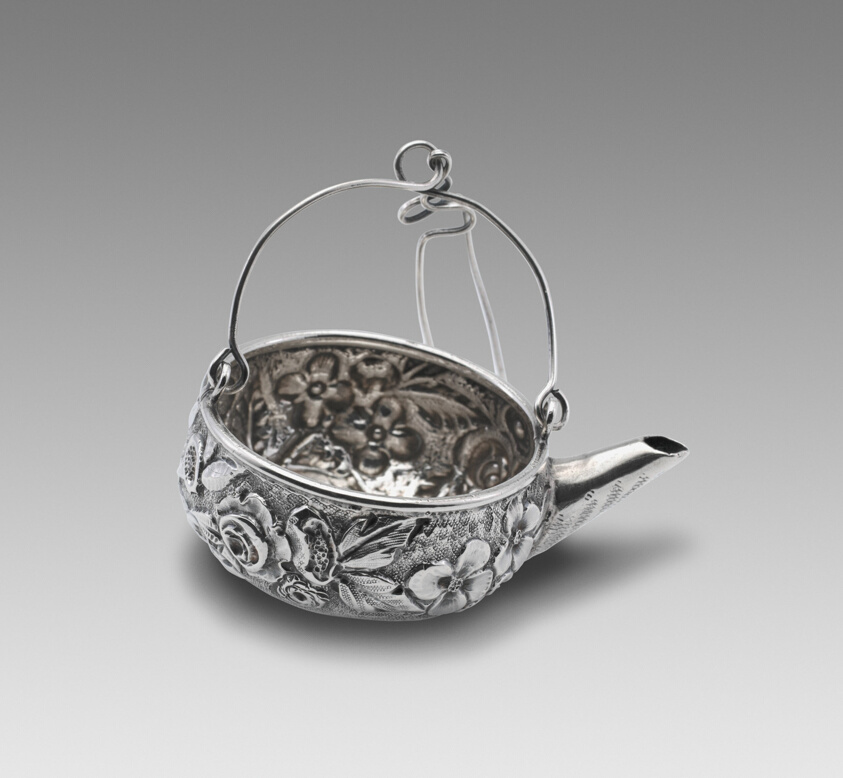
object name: Metalwork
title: Tea Strainer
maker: W.H. Saxton Jr. (American, active 1891–1896); New London, Connecticut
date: 1891–96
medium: Silver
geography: United States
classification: utensil; silver; american decorative arts; american arts; decorative arts